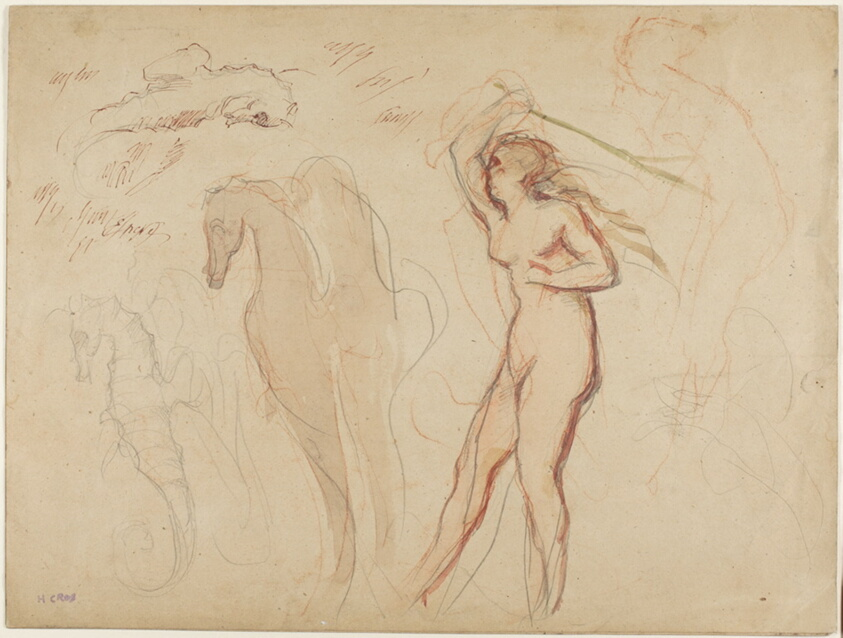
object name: Drawing and Watercolor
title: Sheet of Studies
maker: Henri Cros (French, 1840-1907)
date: c. 1900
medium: Graphite, pen and brown ink, watercolor, and charcoal on paper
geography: France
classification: graphite; drawings (visual works); prints and drawing